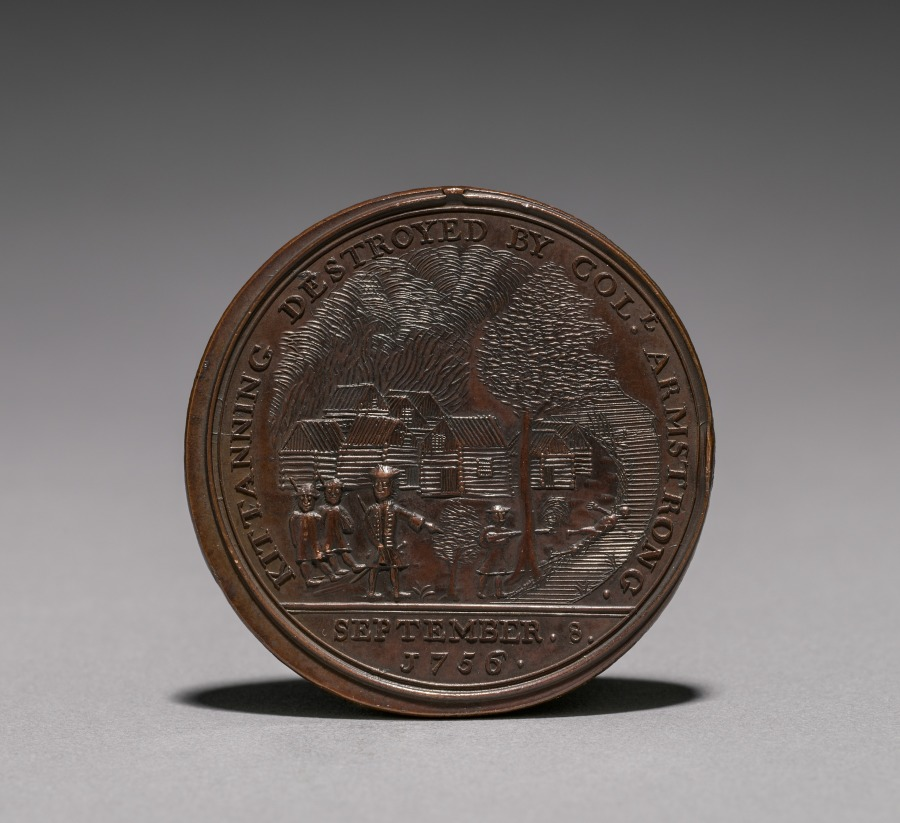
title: Medal: Commemorating the Destruction of Kittanning by Col. Armstrong, 8 September 1756 (reverse)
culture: America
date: 1756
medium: bronze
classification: Metalwork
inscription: Kittaning destroyed by Coll. Armstrong, September 8, 1756.